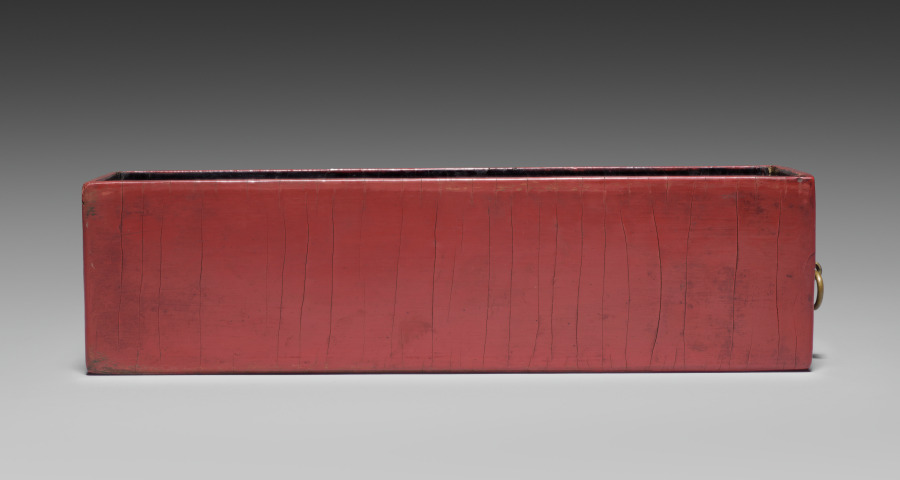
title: Drawer for a Tihong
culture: China, Ming dynasty (1368-1644), Wanli reign (1572-1620)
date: 1585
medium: carved cinnabar lacquer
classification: Lacquer